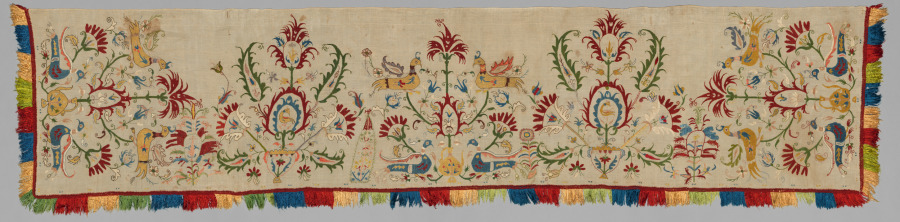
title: Side Panel of a Bedspread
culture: Greece, Sporades Islands, Skyros, 18th century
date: 1700s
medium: embroidery: silk on linen tabby ground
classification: Embroidery